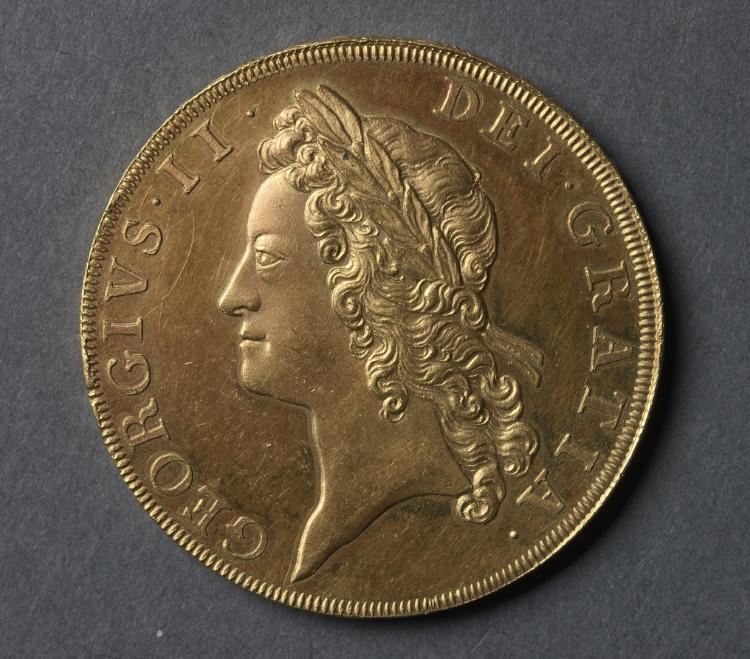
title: Five Guineas: George II (obverse)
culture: England, George II, 1727-1760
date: 1731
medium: gold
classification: Coins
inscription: GEORGIVS . II . DEI . GRATIA .